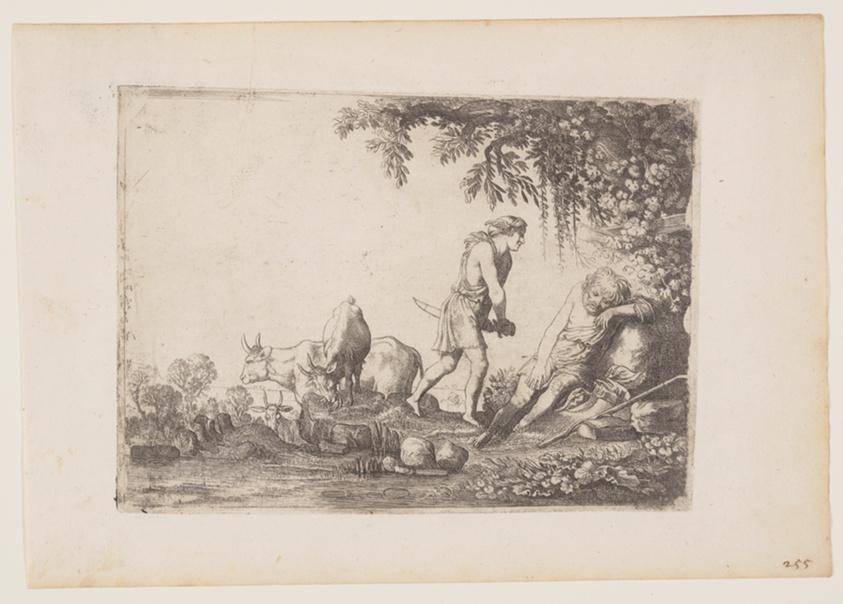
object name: Print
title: Mercury Slays Argus, from The Story of Mercury and Argus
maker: Moses van Uyttenbroeck (Dutch, c. 1595–before 1647)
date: c. 1620-26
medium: Etching on ivory laid paper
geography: Netherlands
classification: etching; paper; print; prints and drawing